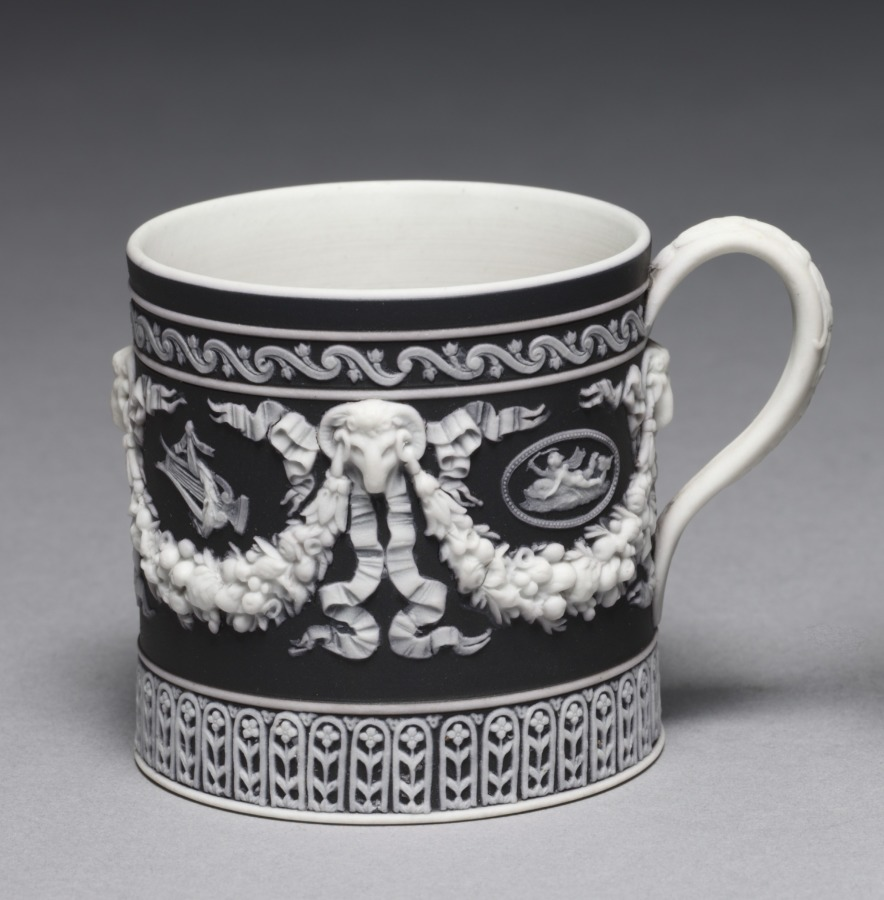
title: Cup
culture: England, Staffordshire, 18th century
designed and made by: Wedgwood Factory (British)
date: c. 1790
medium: jasper ware with relief decoration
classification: Ceramic